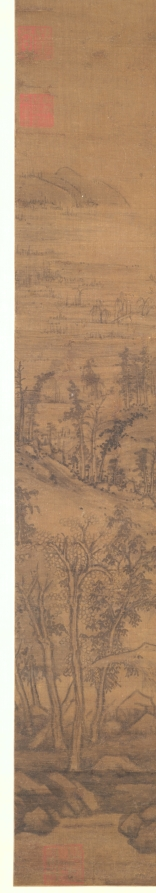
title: Summer Mountains (after Dong Yuan [active c. 937–75])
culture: China, Yuan dynasty (1271-1368)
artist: attributed to Huang Gongwang (Chinese, 1269–1354)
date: 1290–1354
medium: hanging scroll; ink and slight color on silk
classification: Painting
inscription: 【印】一峰道人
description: This monumental landscape is drawn in softly rounded strokes with darker lines frequently applied on top of lighter ones. This technique recalls one of the suggestions included in a collection of the artist's writings known as Secrets of Landscape Painting: The most difficult thing in painting is using the ink. The artist begins by using dilute ink and builds it up to the point where it begins to look right, then uses dense, black ink, applied fairly dry, and washes of deeper-toned ink. This technique distinguishes the fields from the paths, the far from the near. Huang Gongwang may have learned this technique from observing nature through the eyes of an earlier master, Dong Yuan, a painter whose style he shared.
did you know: The wet hills and moist, rich atmosphere evoke the southern Chinese summer, characterized by monsoon rains and lush growth.